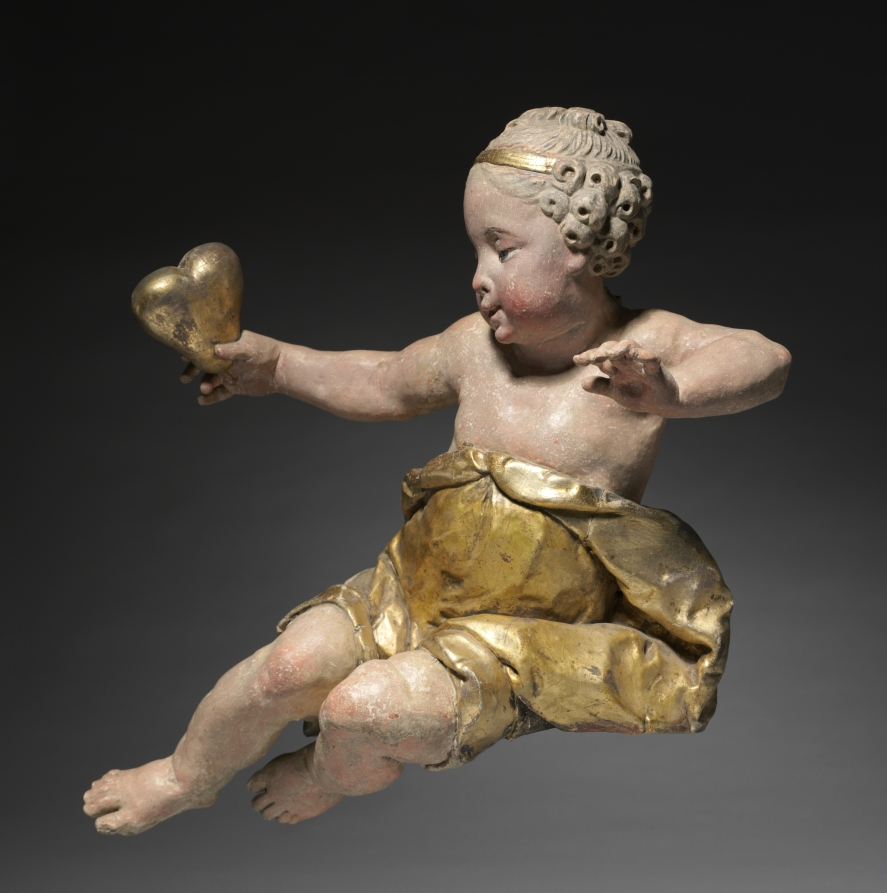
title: Putto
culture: Germany, near Bamberg, 18th century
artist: Ferdinand Tietz (Austrian, 1708–1777)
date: mid-1700s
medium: painted and gilded wood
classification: Sculpture